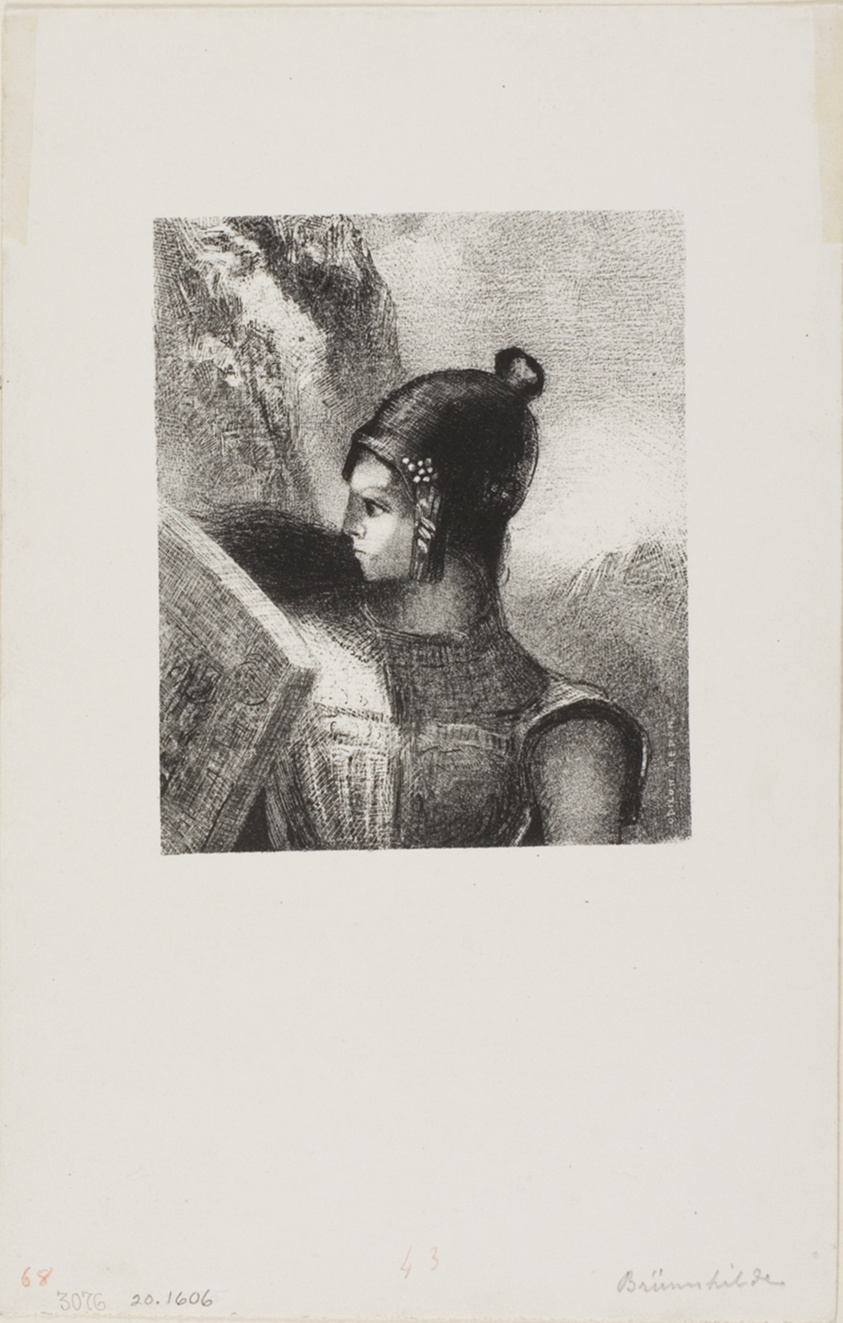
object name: Print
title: Brunnhilde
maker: Odilon Redon (French, 1840-1916)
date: 1886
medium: Lithograph in black on white wove paper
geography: France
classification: lithograph; print; prints and drawing; paper